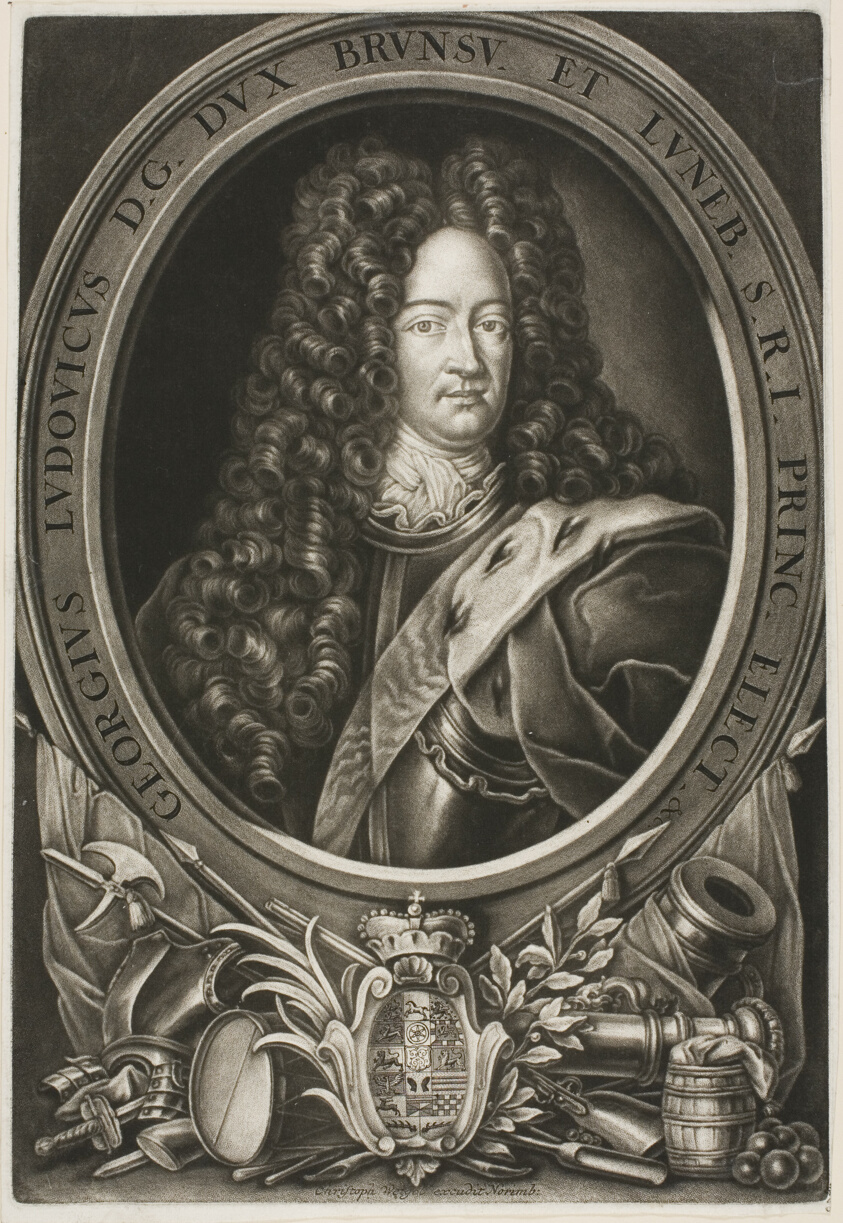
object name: Print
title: Georg Ludwig, Duke of Braunschweig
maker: Christoph Weigel (German, 1654-1725)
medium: Mezzotint on paper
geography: Germany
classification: mezzotint; print; prints and drawing